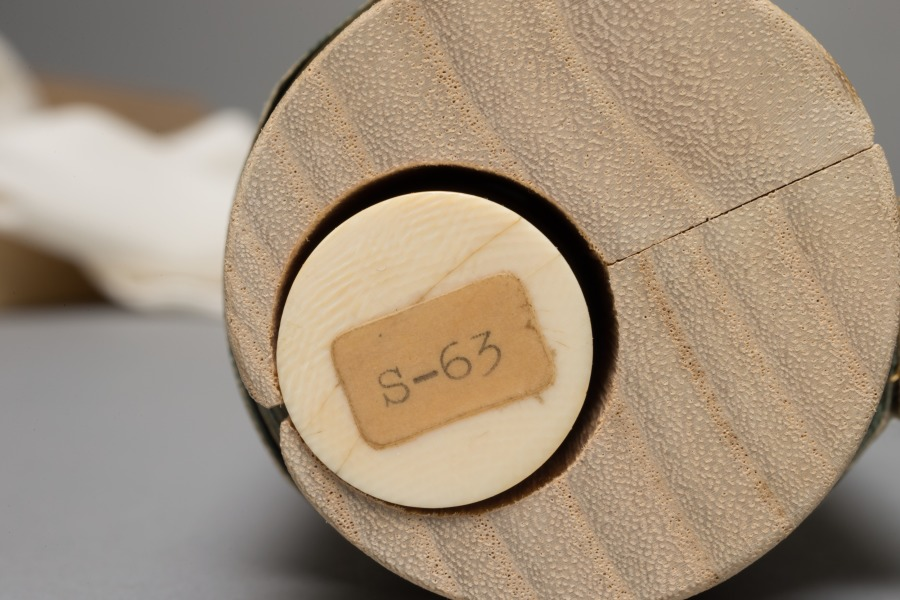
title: Kakinomoto no Hitomaro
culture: Japan, Kamakura period (1185–1333)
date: early 1300s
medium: hanging scroll; ink and color on silk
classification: Painting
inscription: 浦のあさ霧にしま隠れゆく舟をしぞ思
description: Among Japan’s greatest poets, Kakinomoto no Hitomaro’s (c. 660–724) portrait was often displayed at poetry competitions. Here, he gazes up at a falling cherry blossom, his writing box before him, brush and paper in his hands. A short biography and one of his poems are inked on painted rectangles meant to look like decorated papers. The first part of the poem has been mostly lost, but from what remains, it is possible to recognize it as Dimly, dimly in the morning mist that lies over Akashi Bay, my longings follow with the ship that vanishes behind the distant isle. —Translated by Robert H. Bower and Earl Roy Miner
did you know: The landscapes at the top and bottom of the painting depict Akashi Bay, with its famous pines along the shore, and a lone figure in a boat.